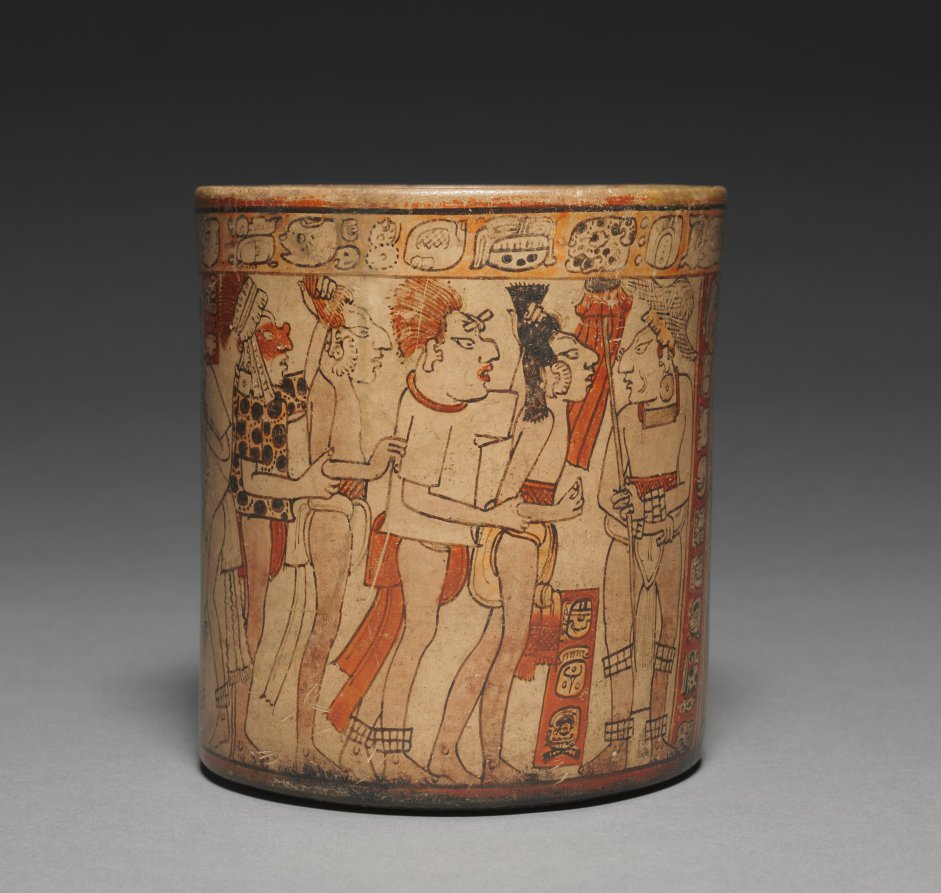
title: Vessel with Battle Scene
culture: Mesoamerica, Maya, Nebaj region, Late Classic Period, 7th-10th century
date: 600–900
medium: ceramic and slip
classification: Ceramic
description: Likely used as a political gift, this vessel depicts the presentation of prisoners in the aftermath of battle. A front-facing lord turns to review ten elegantly drawn warriors, some stripped of battle regalia and others dressed in elaborate headgear and garments, including tunics made of jaguar pelts. The hieroglyphs encircling the rim dedicate the vessel, used to drink an elite beverage made of cacao (chocolate) beans.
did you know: The Maya drank a chocolaty beverage with a spicy kick! Made using cacao seeds and chili peppers, the drink was consumed out of vessels like this one.